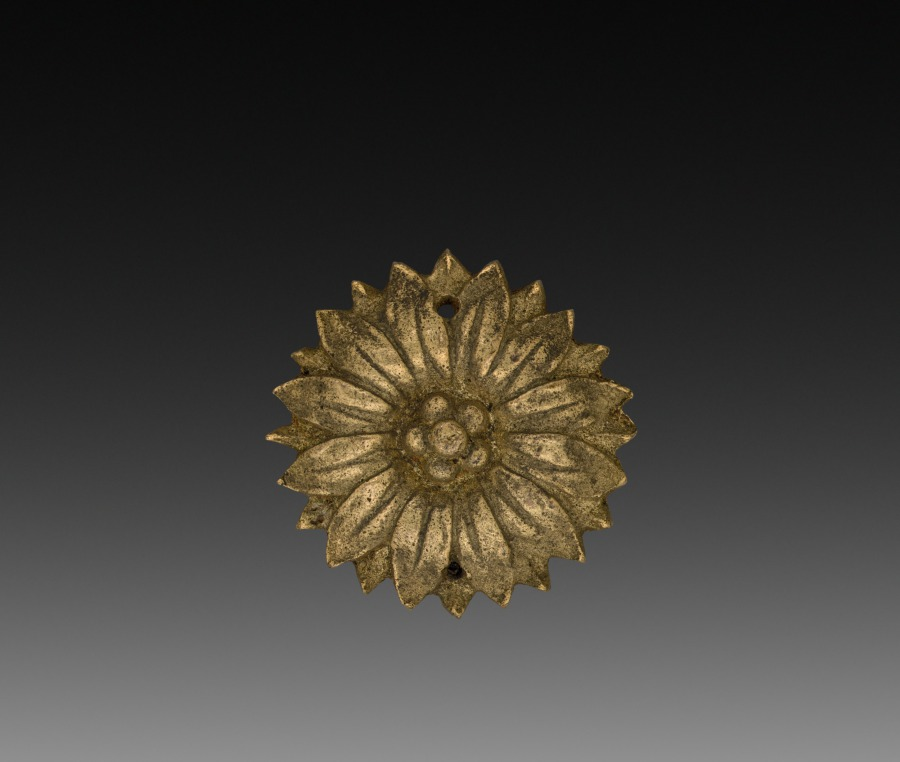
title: Ornamental Rosette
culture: France, late 18th century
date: late 1700s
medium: gilt bronze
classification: Metalwork